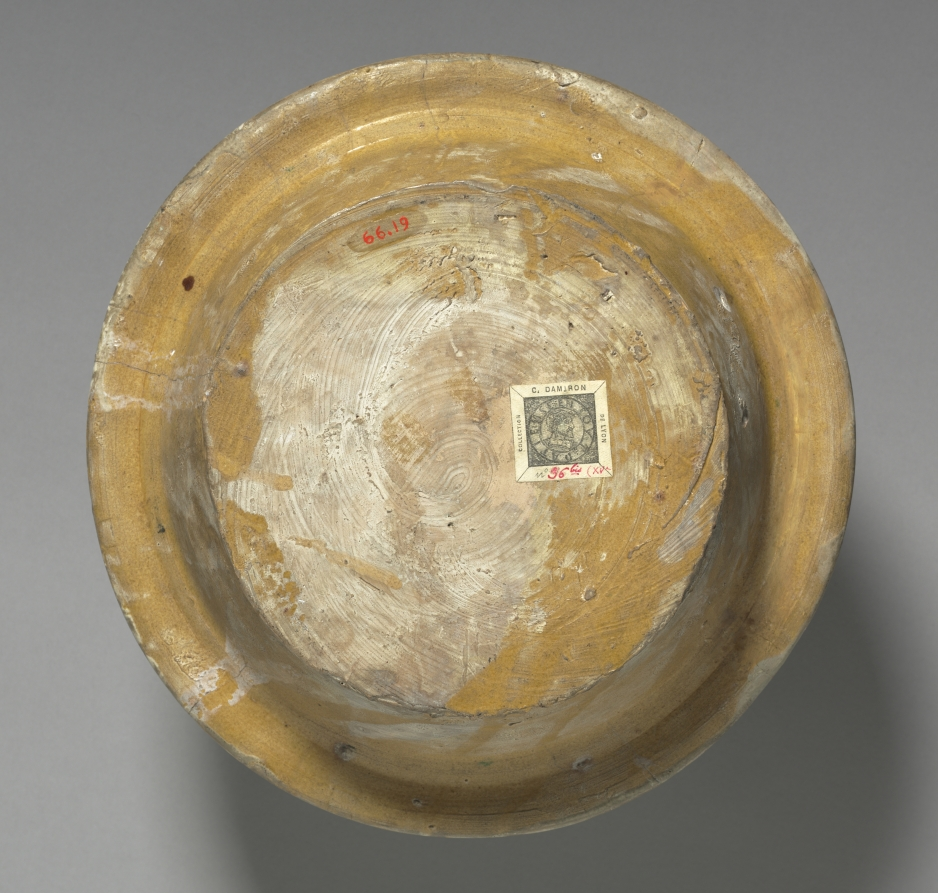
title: Dish with a Lion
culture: Italy, Florence, 15th century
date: c. 1430–50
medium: tin-glazed earthenware (maiolica)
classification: Ceramic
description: This dish is representative of the rustic type of maiolica produced in Italy before 1450. The design is much inspired by contemporary Spanish earthenware. The surface of the dish is painted in a cobalt blue impasto technique known as zaffera a rilevo. Lions frequently adorn wares decorated in this technique and are particularly appropriate as a Florentine motif-they probably refer to that city's lion emblem.